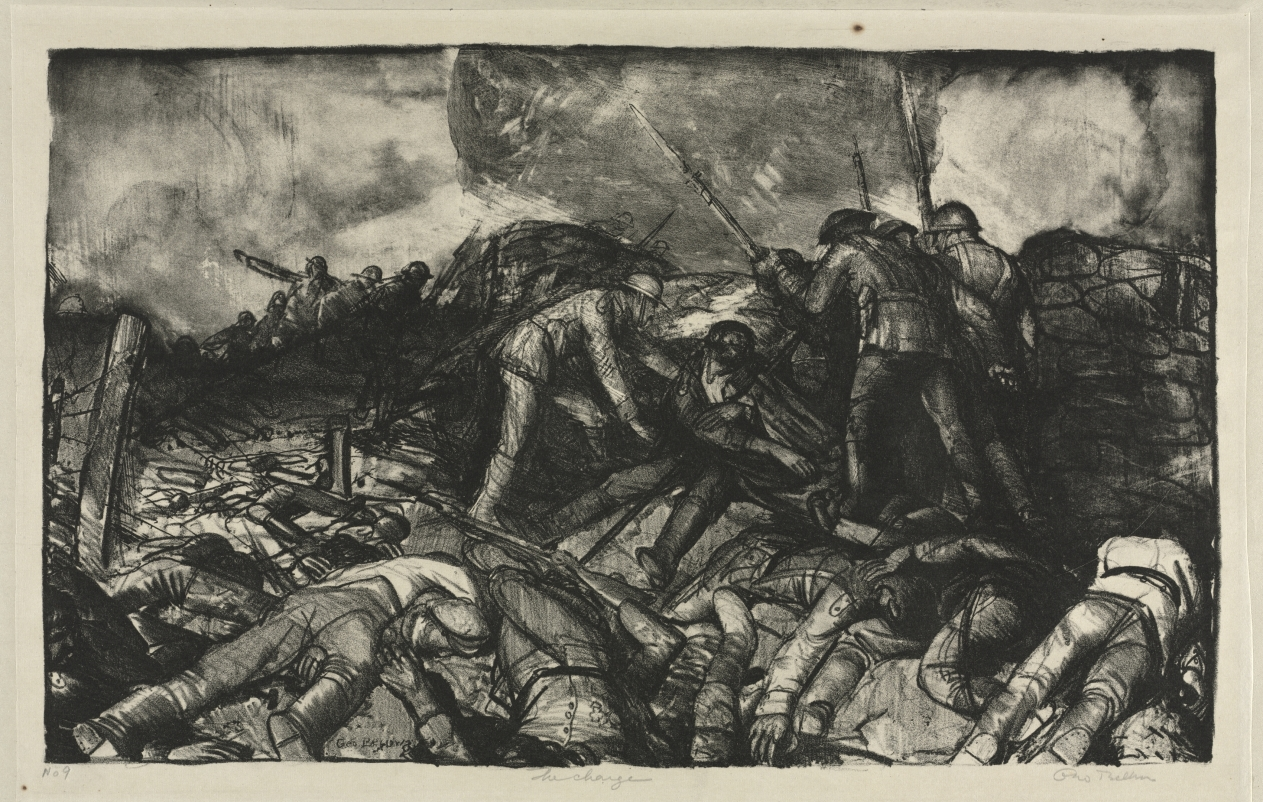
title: War Series: The Charge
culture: America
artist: George Bellows (American, 1882–1925)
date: 1918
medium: lithograph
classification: Print